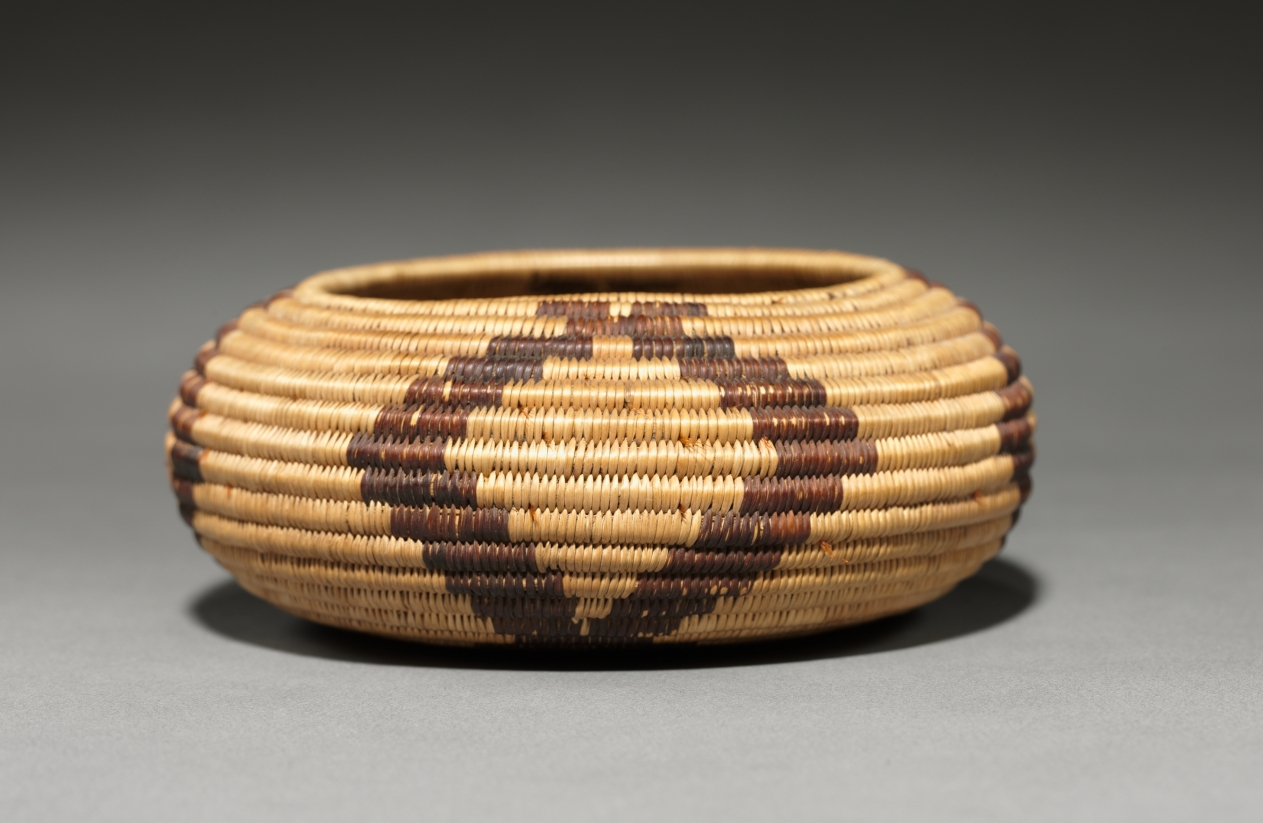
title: Bowl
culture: California, Pomo, Late 19th- Early 20th century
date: 1890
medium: Undyed Bulrush, Sedge; Coiled (3 rods)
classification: Basketry